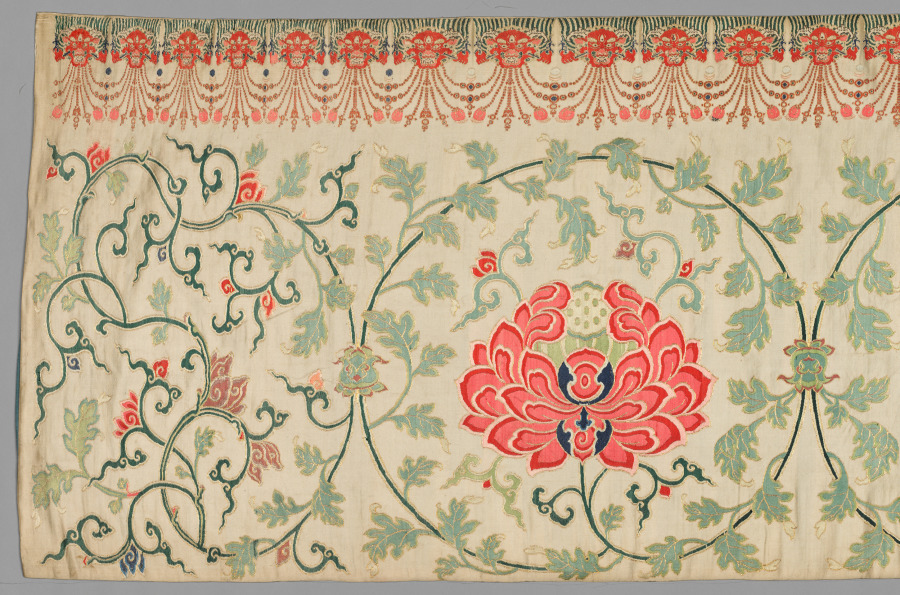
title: Brocaded Strip, known as "Imperial Tribute Brocade"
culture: China, Qing dynasty (1644-1911)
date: c. 1770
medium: brocaded satin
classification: Textile